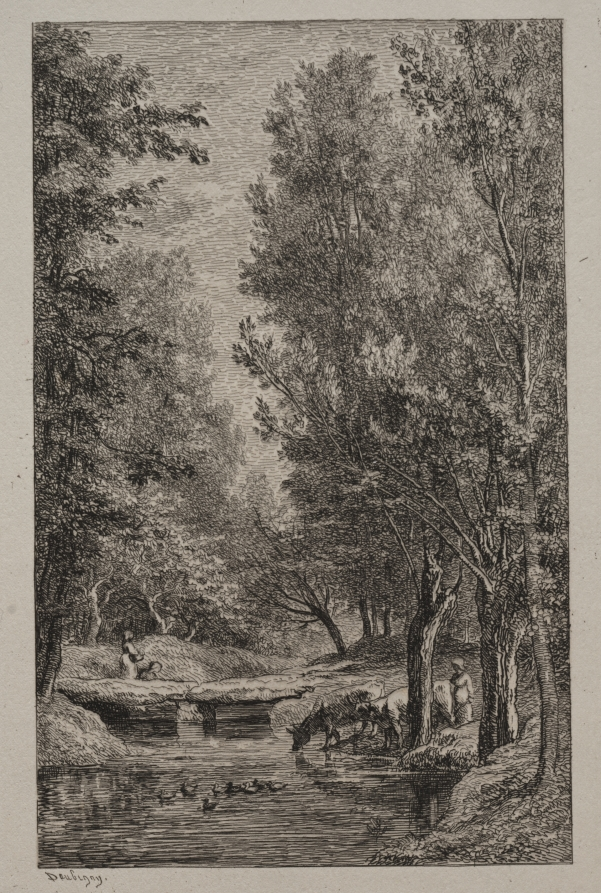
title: Brook in the Val Mondois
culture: France, 19th century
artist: Charles François Daubigny (French, 1817–1878)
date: c. 1862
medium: etching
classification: Print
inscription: signed, lower left, in plate: Daubigny